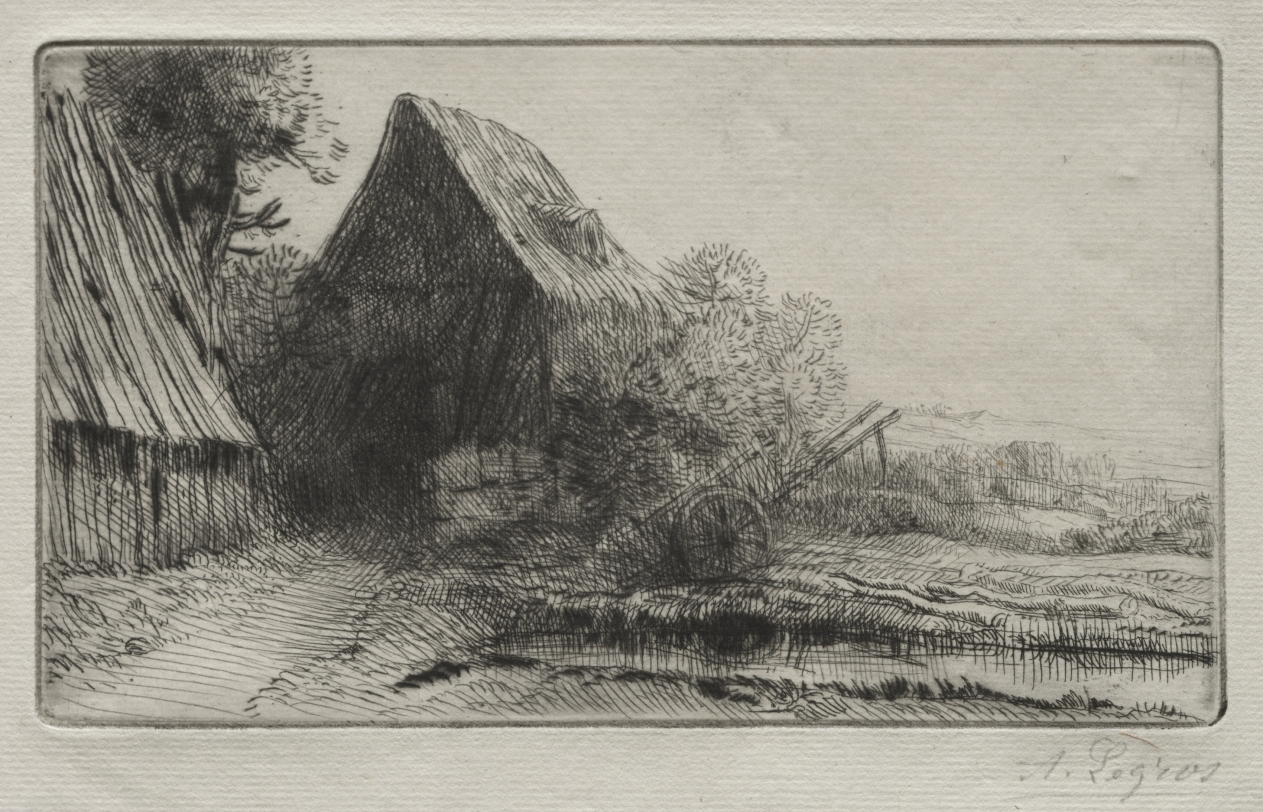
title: Le Maison du charron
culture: France, 19th-20th century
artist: Alphonse Legros (French, 1837–1911)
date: c. 1857–1911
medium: etching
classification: Print